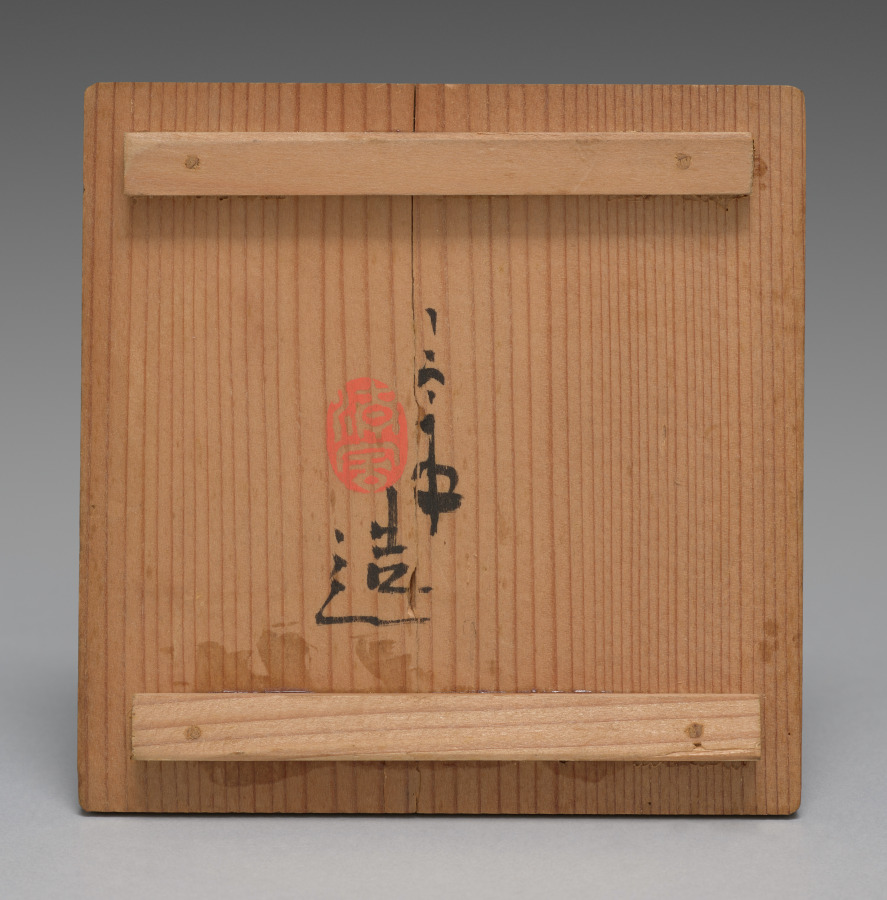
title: Teacups with Floral Band Motif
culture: Japan, Meiji period (1868–1912)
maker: Seifū Yohei III (Japanese, 1851–1914)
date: 1893–1914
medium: Set of five teacups; porcelain with incised decoration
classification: Ceramic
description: The five sencha teacups in this set are decorated with incised flowers and dots between a double band at the top and a single band at the bottom. They are in Yohei III’s creamy taihakuji body and glaze. In their motifs, they are quite similar to an incense burner by Yohei III (see CMA 2022.180), but the flowers are even more simple in design, with no open circle at the center. A label affixed to the side of the box refers to them as “sencha cups in emulation of Korean white [ware].” The reference to Korean ware indicates that even though Yohei was more directly inspired by Qing dynasty wares from the Dehua kilns in Fujian Province in developing his porcelain clay and glaze for works such as these, the general understanding of the continental models still placed them, at least in terms of color, among pieces broadly associated in Japan with Korean white wares. The delicate cups are thinly potted, so they have a highly desirable translucency.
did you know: The delicate cups are thinly potted, so they have a highly desirable translucency.